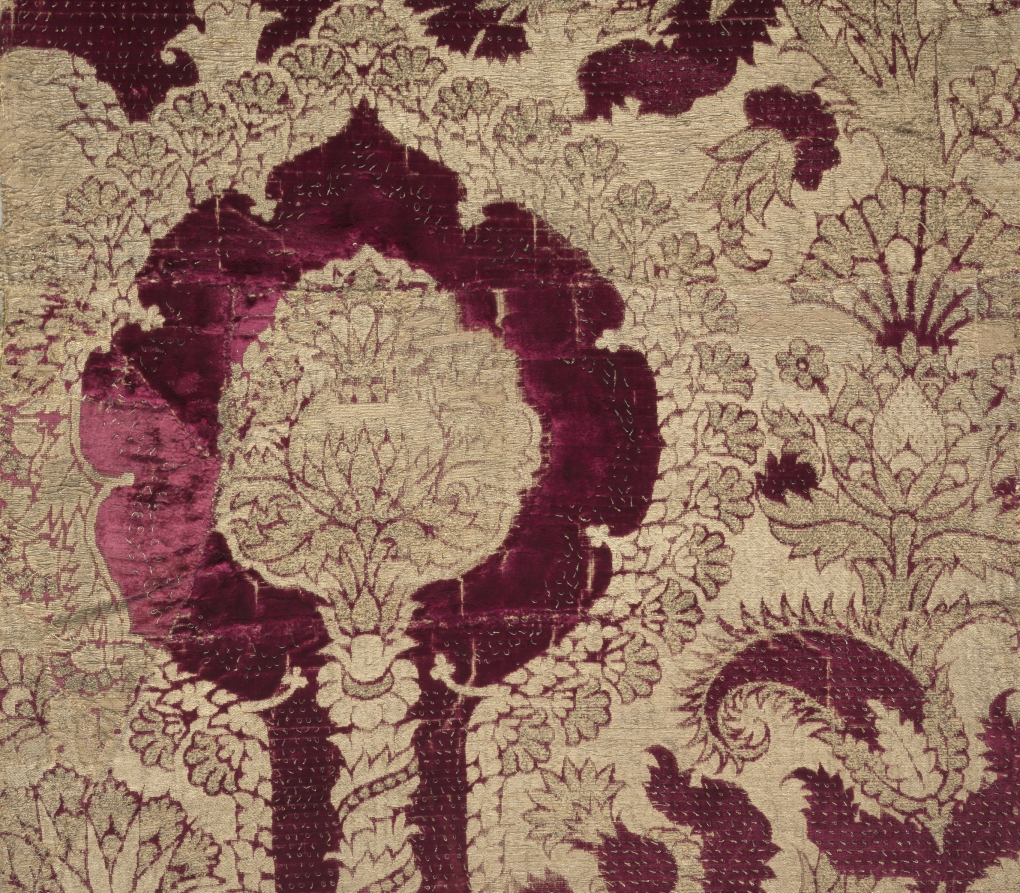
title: Velvet with Pomegranate Pattern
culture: Italy, Florence, 15th century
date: 1450–1500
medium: silk, gold thread; velvet: three heights of cut pile, gold thread loops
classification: Velvet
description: This extravagant Italian velvet with three heights of lush crimson pile is lavishly embellished with gold-thread loops. Large pomegranate patterns such as this were fashionable in Europe for more than a century, about 1420 to 1550, and were often featured in paintings and in large wall tapestries. Variations occurred in pattern details, pile height, and gold thread. Since pomegranates symbolized eternity, fertility, and resurrection, these velvets were often used in Roman Catholic churches. This pomegranate pattern inspired the cope, or cloak, worn by the Archbishop of Canterbury when he officiated the royal wedding of Prince William and Kate Middleton in 2011.